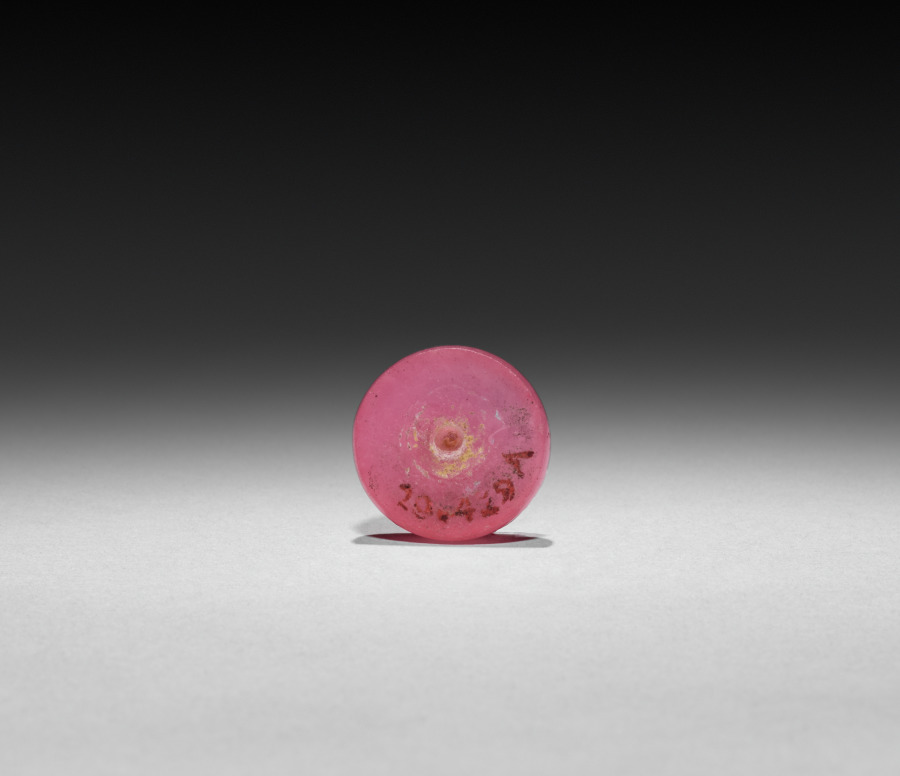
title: Snuff Bottle (stopper)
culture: China, Qing dynasty (1644-1911)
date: 1644–1911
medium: glass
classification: Glass